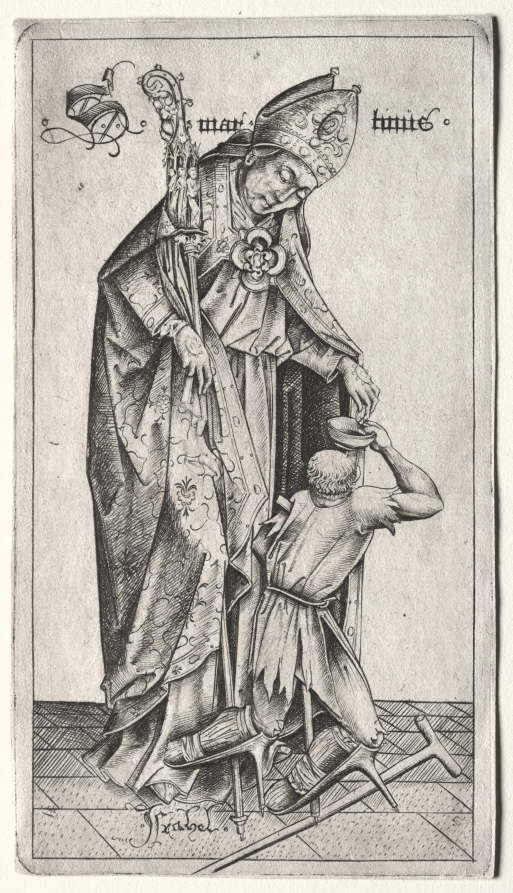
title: St. Martin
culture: Germany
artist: Israhel van Meckenem (German, c. 1440–1503)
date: c. 1465–1500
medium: engraving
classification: Print